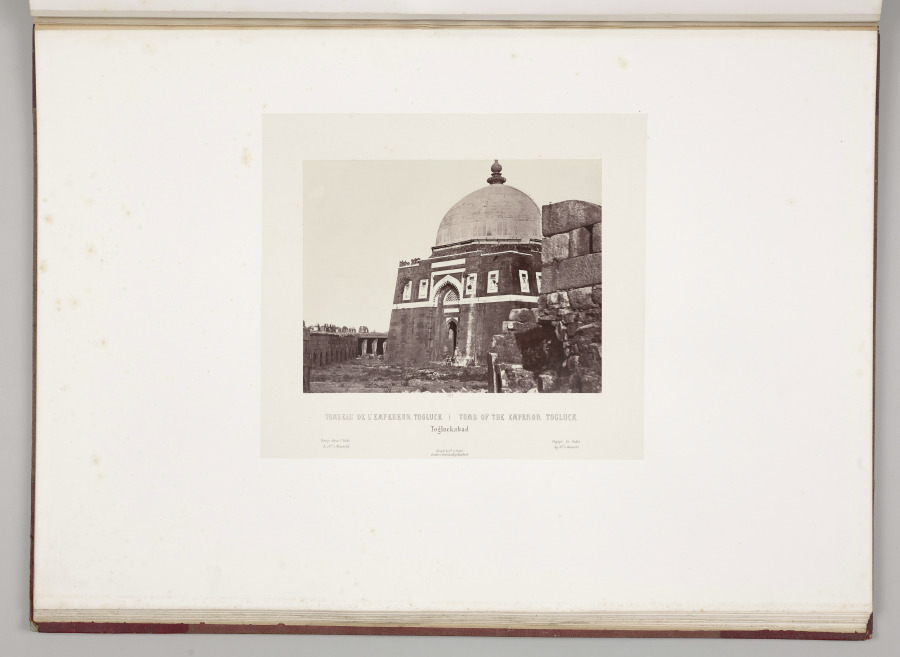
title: Tomb of the Emperor Togluck, Togluckabad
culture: France, 19th century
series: India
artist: Louis-Théophile Marie Rousselet (French, 1845–1929)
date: 1865–68, published 1869–70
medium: Albumen print from glass plate negative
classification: Photograph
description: Concerned that his drawings did not do justice to the splendor of India’s monuments, Rousselet learned photography in India that year, a remarkable accomplishment. He proved to be a talented photographer with a sophisticated sense of composition. The scenes in this volume sweep across sites of Sultanate, Rajput, and Mughal power in northern India, from the sacred Hindu city of Varanasi on the Ganges River to Alwar in Rajasthan. Also included are several scenes of industry and portraits of Indian rulers.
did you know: Louis Rousselet described himself as a “scientific traveler” when he went to India alone at age 18 in 1863 and stayed into 1868.